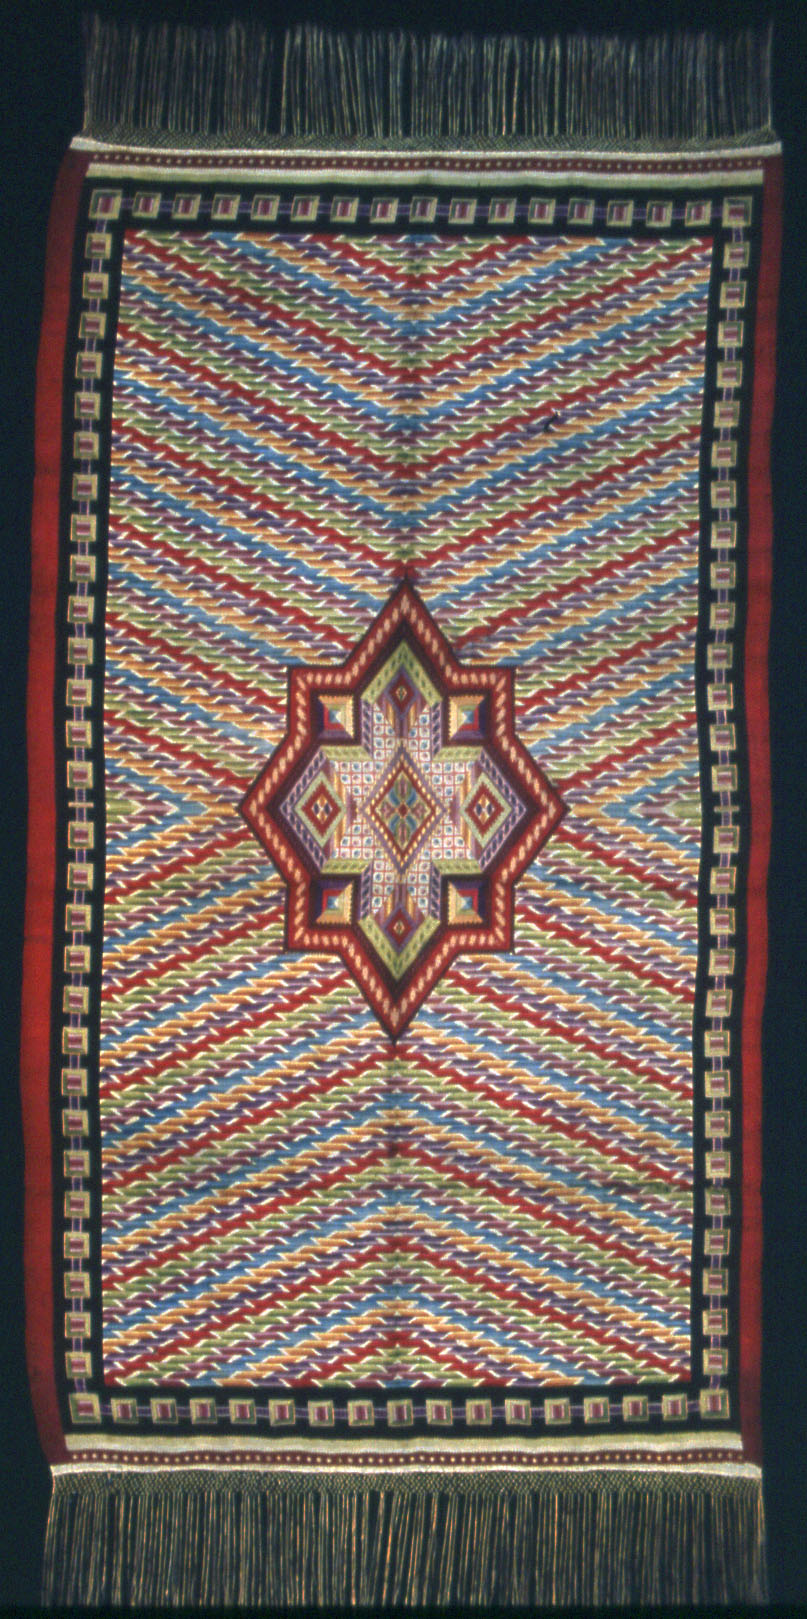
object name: Textile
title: Sarape (Interpretation of Mexican Saltillo Serape)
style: Folk Art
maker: Germany or Czechoslovakia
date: 1875/1900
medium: Cotton and wool, plain weave; painted; attached knotted fringe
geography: Germany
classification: textile; weaving - printed; weaving